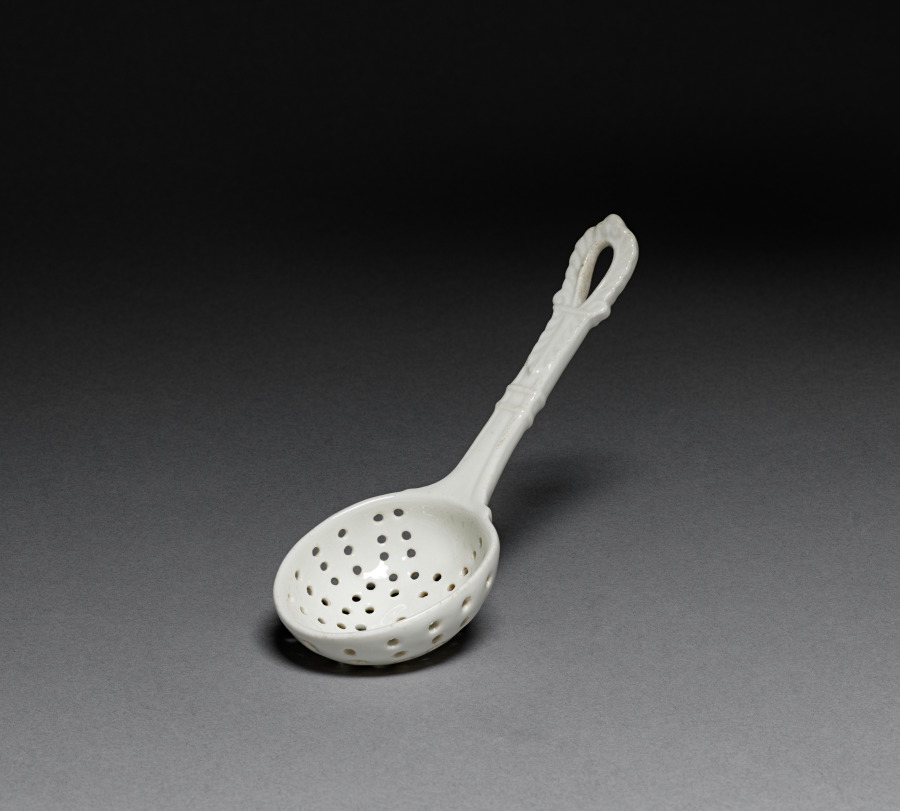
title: Sugar Spoon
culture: France, 18th century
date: c. 1780 ?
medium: soft-paste porcelain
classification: Ceramic